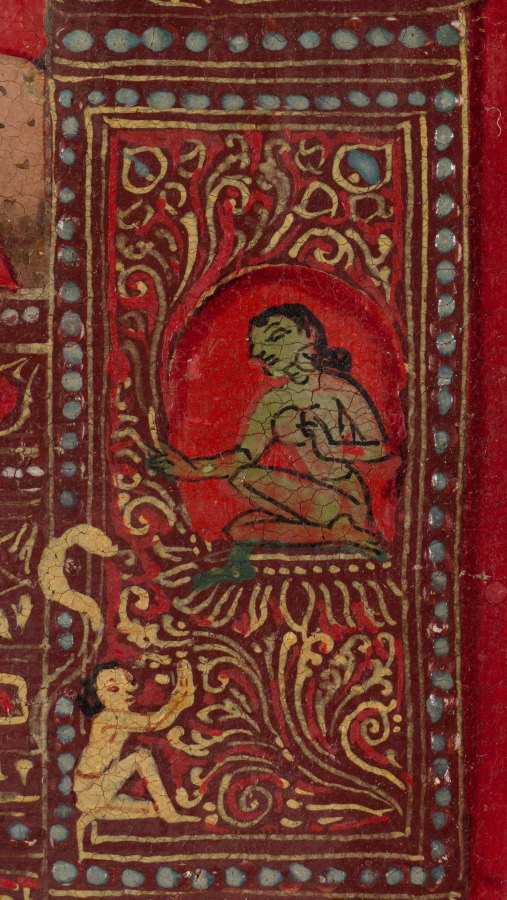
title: Green Tara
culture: Central Tibet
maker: attributed to Aniko (Nepalese, active in Tibet mid- to late 1200s)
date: c. 1260s; mounted, 2020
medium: thangka; gum tempera, ink, and gold on sized cotton; mount: silk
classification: Painting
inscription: Om Ah Hum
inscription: om tare tutare ture svaha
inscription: Om Ah Hum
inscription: Om Ah Hum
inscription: om ah sarva vyida svaha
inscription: ye dharmā hetuprabhavā he- tuṃ teṣāṃ tathāgato hy avadat teṣāṃ ca yo nirodha evaṃvādī mahāśramaṇaḥ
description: For Tibetans, Green Tara is one of the preeminent figures of their Buddhist faith, a radiant savioress who embodies the female form of the perfect, enlightened mind. The Green Tara in the Cleveland thangka—a Tibetan devotional painting on cloth—specifically dispels fear and provides protection, just like her mantra inscribed on the back side of the painting. Her green color and fear-not gesture link her to the cosmic Buddha of the North, enshrined above her head. Most scholars agree that this work was painted by the celebrated Nepalese artist known as Aniko.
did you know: The tiny monastic figure under Green Tara's right hand commissioned the painting.